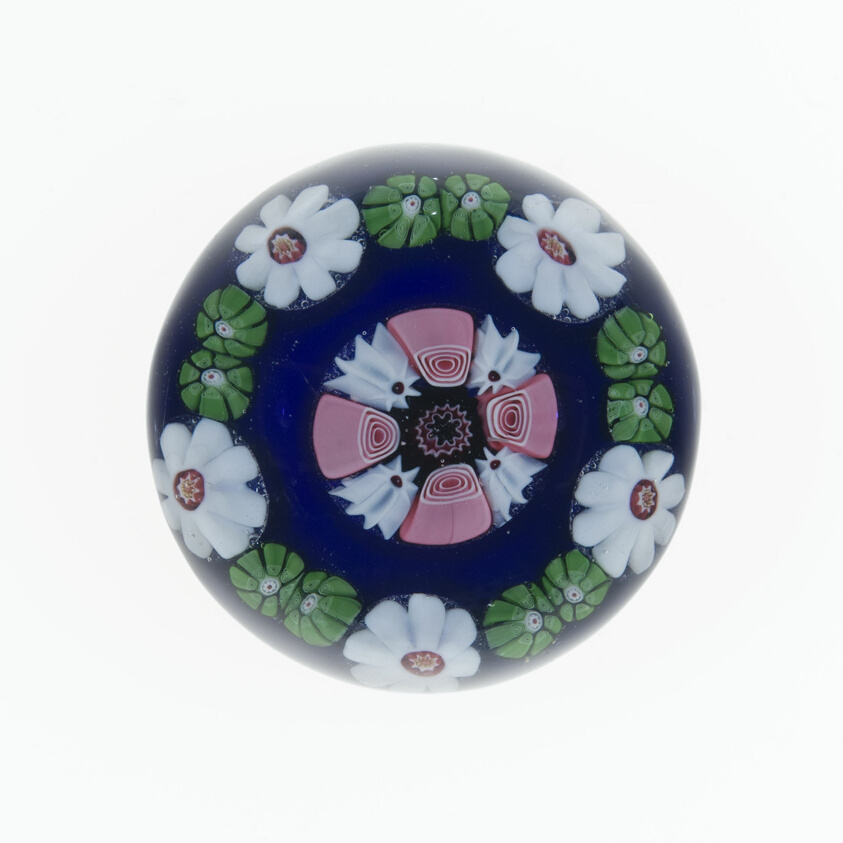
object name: Glass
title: Paperweight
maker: Clichy Glassworks (Cristalleries de Clichy); Clichy, France, 1837-1885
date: 19th century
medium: Glass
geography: Clichy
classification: paperweight; millefiori; european decorative arts; glass